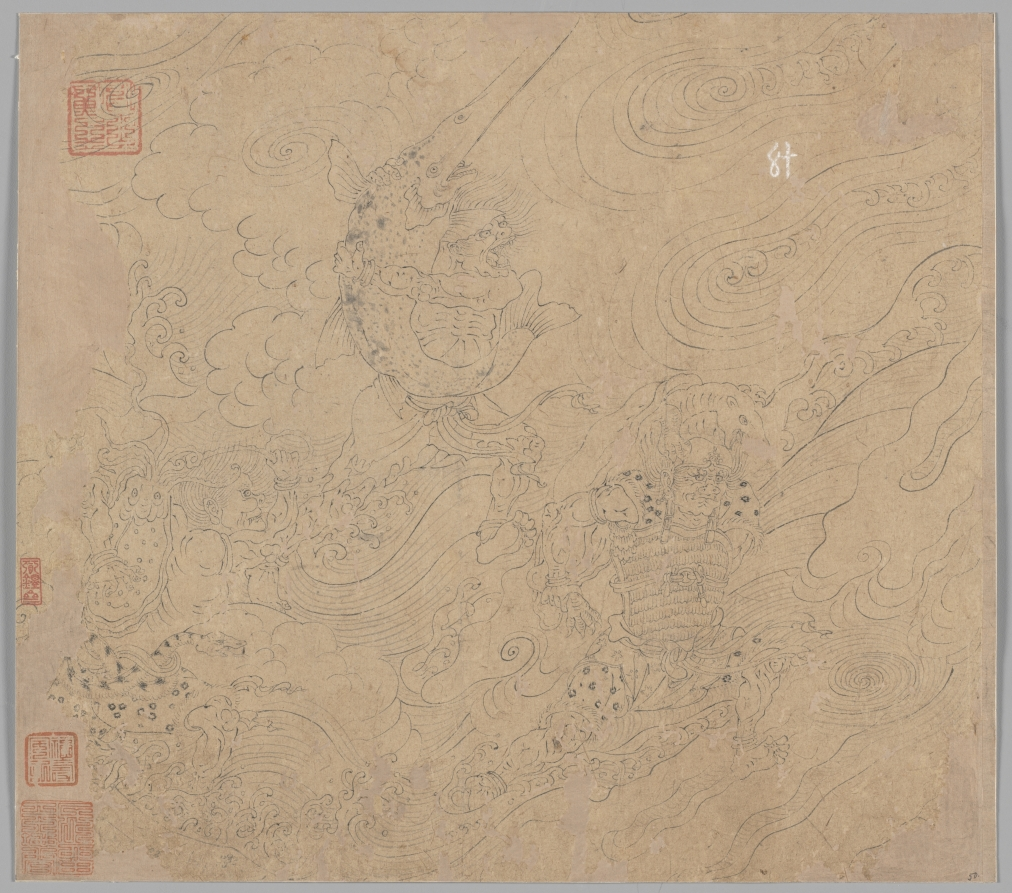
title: Album of Daoist and Buddhist Themes: Search the Mountain: Leaf 50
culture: China, Southern Song dynasty (1127-1279)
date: 1200s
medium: Album, ink on paper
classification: Painting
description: This extraordinary album has 50 paintings on a variety of religious subjects. They were likely created by several master craftsmen to share with studio apprentices as models for fulfilling commissions. The Jade Emperor and the Daoist pantheon make up the first 26 leaves. The next 14 leaves portray the Buddhist Ten Kings of Hell administering punishments to the dead. The third section, called “Clearing the Mountains,” features divine soldiers, led presumably by the deity Erlang Shen 二郎神, fighting undesirable creatures.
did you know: Demon-soldiers hold a giant swordfish and battle sea creatures amid floods and waves.